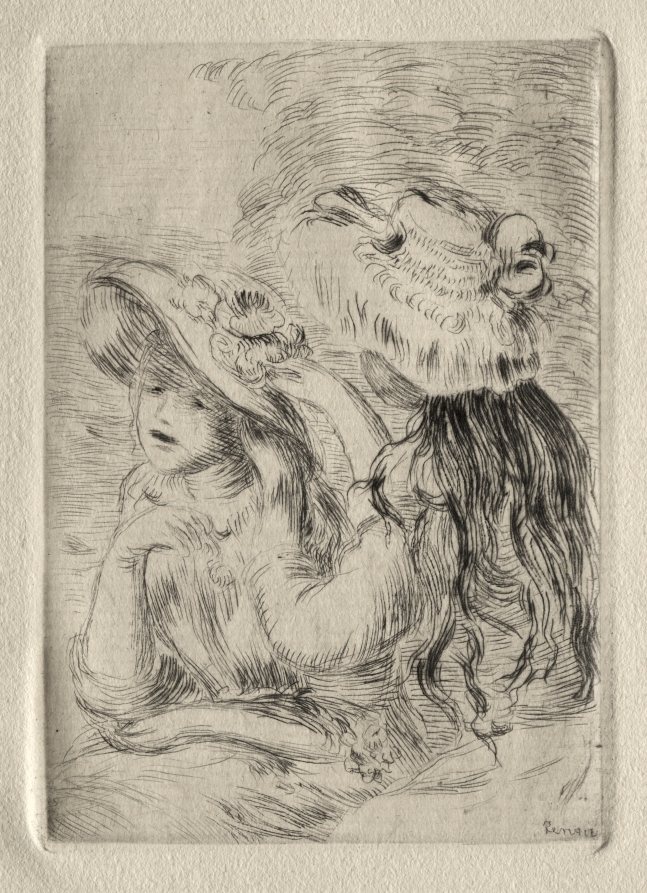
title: The Hatpin (Berthe Morisot's Daughter and Her Cousin), 1st plate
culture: France, late 19th-early 20th century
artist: Pierre-Auguste Renoir (French, 1841–1919)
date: c. 1894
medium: etching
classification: Print